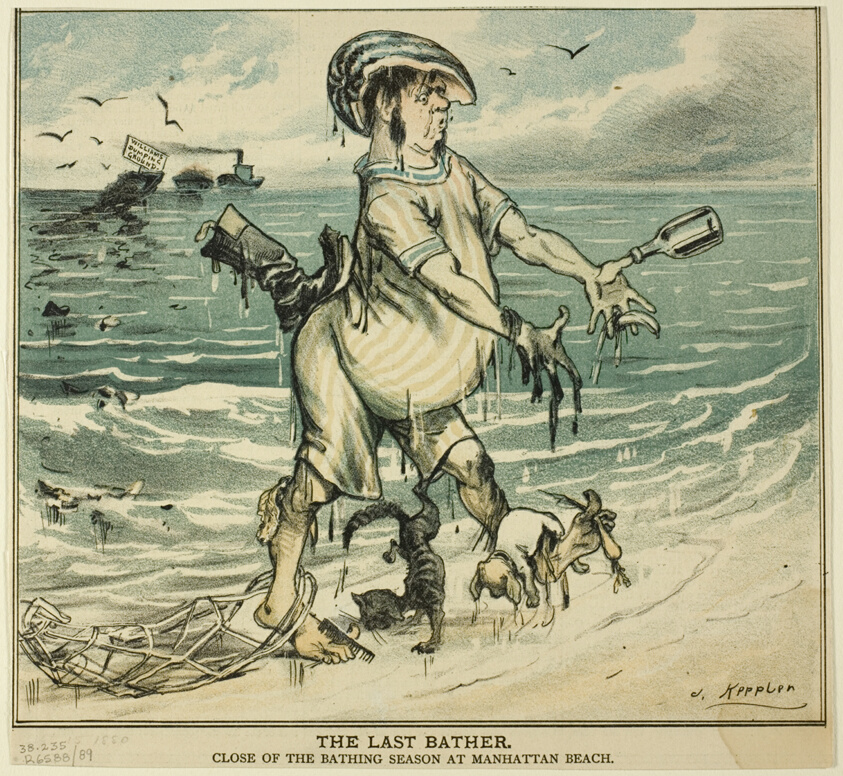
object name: Print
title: The Last Bather, from Puck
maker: Joseph Keppler (American, 1638-1894)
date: 1880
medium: Color lithograph on newsprint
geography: United States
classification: lithograph; print; prints and drawing